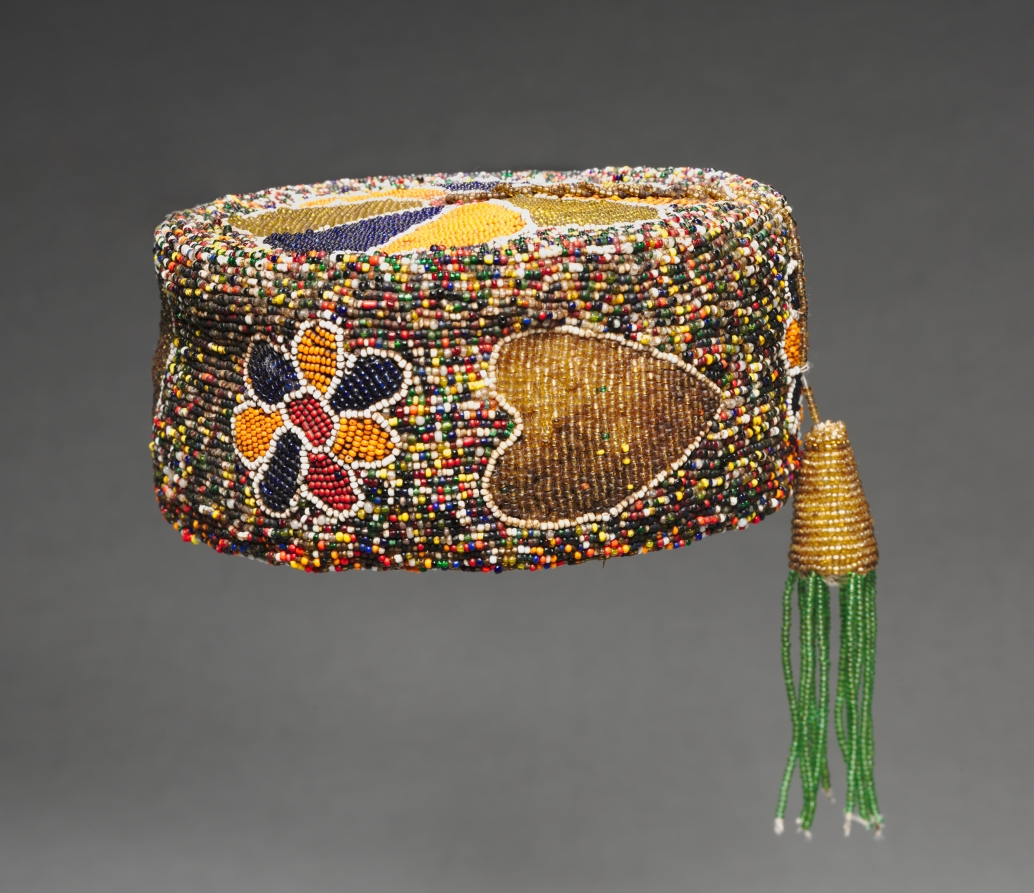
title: Coronet (oríkògbófo)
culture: Africa, West Africa, Nigeria, Yorùbá-style maker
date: 1900s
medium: Cloth, glass beads, and thread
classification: Garment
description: Like the rare conical crown (ade), the coronet (oríkògbófo) may only be worn by a king descended from Oduduwa, the first king of the Yorùbá. While the crown is reserved for special occasions, the coronet may be used by the king for less formal public events and when entertaining non-Yorùbá visitors. It signifies wealth rather than royal status.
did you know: The beads on this sculpture were imported, likely from Venice or Bohemia (now called the Czech Republic).